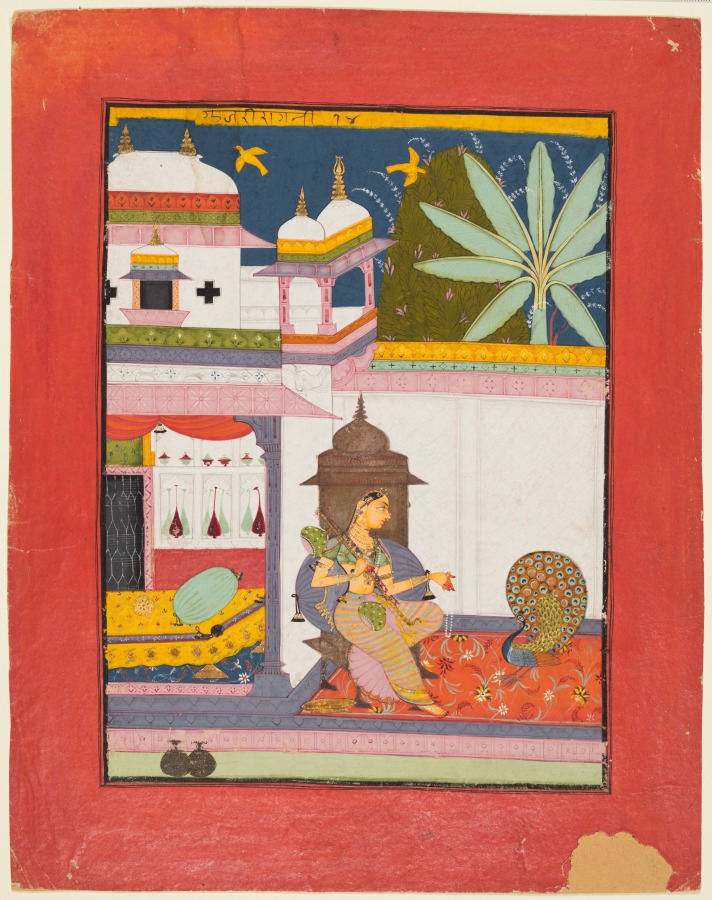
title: Woman Addressing a Peacock: Gujari Ragini of Megh, from a Ragamala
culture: Northwestern India, Rajasthan, Rajput Kingdom of Bundi or Raghogarh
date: c. 1680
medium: gum tempera and gold on paper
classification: Painting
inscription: gujarī rāganī. 14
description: Gujari Ragini, a musical mode, is personified as the one who sings songs praising her beloved on experiencing pangs of separation. She sits on a throne outside a well-appointed chamber and holds her stringed instrument, the vina, in her right hand. Her songs have attracted a male peacock who dances to the tunes she sings. A pair of yellow birds take flight in the background.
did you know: The heroine presents her pearl necklace to the peacock.